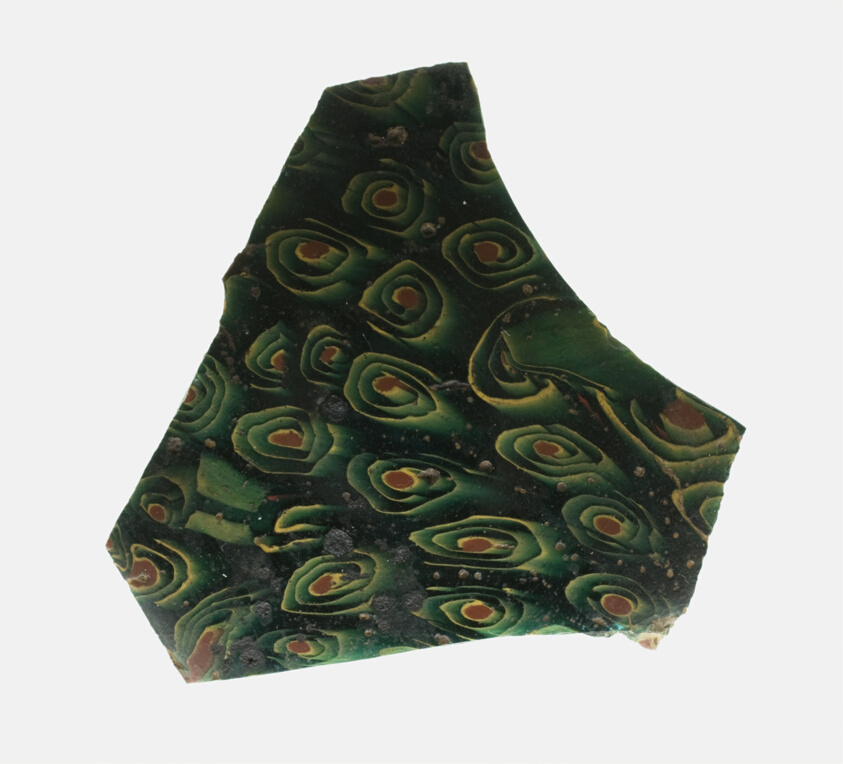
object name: Decorative Arts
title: Fragment of a Bowl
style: roman (ancient, style or period), ancient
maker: Roman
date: 1st century BCE–1st century CE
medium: Glass, mosaic glass technique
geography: Italy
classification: fragment; decorative arts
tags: decoration